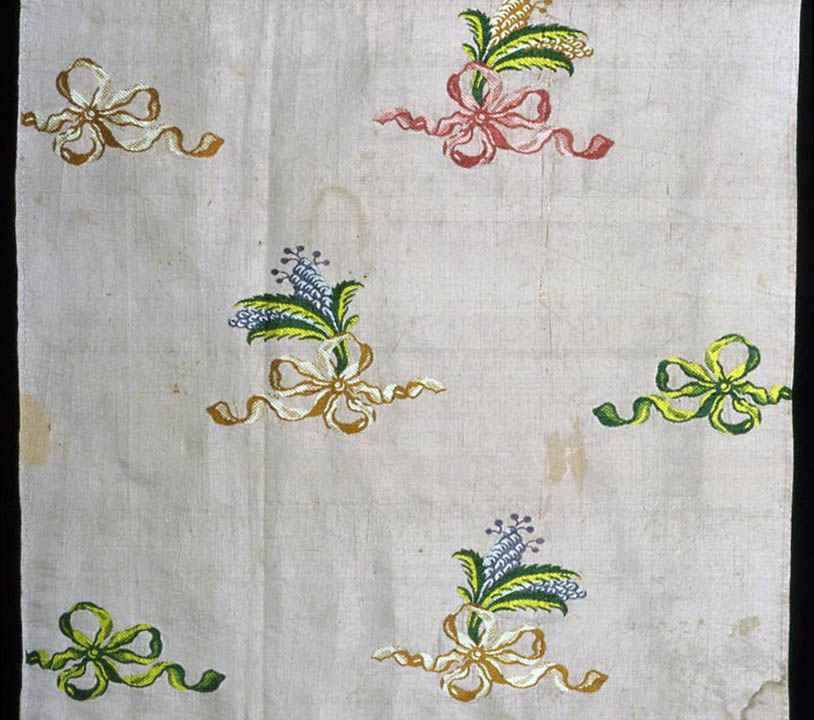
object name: Textile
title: Panel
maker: England, Spitalfields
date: 1725/50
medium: Silk, plain weave with supplementary brocading wefts bound in twill interlacings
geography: Spitalfields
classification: textile; weaving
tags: flowers